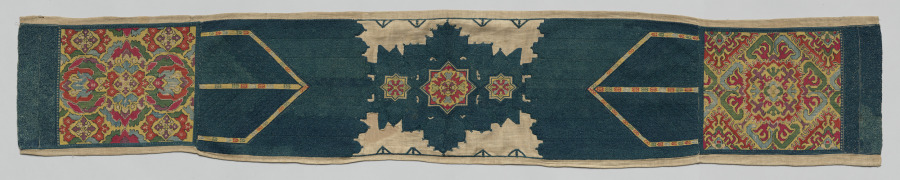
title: Furnishing textile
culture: Africa, North Africa, Morocco, Chefchaouen, Moroccan embroiderer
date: 1600s–1700s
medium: silk on linen tabby ground, embroidery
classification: Embroidery